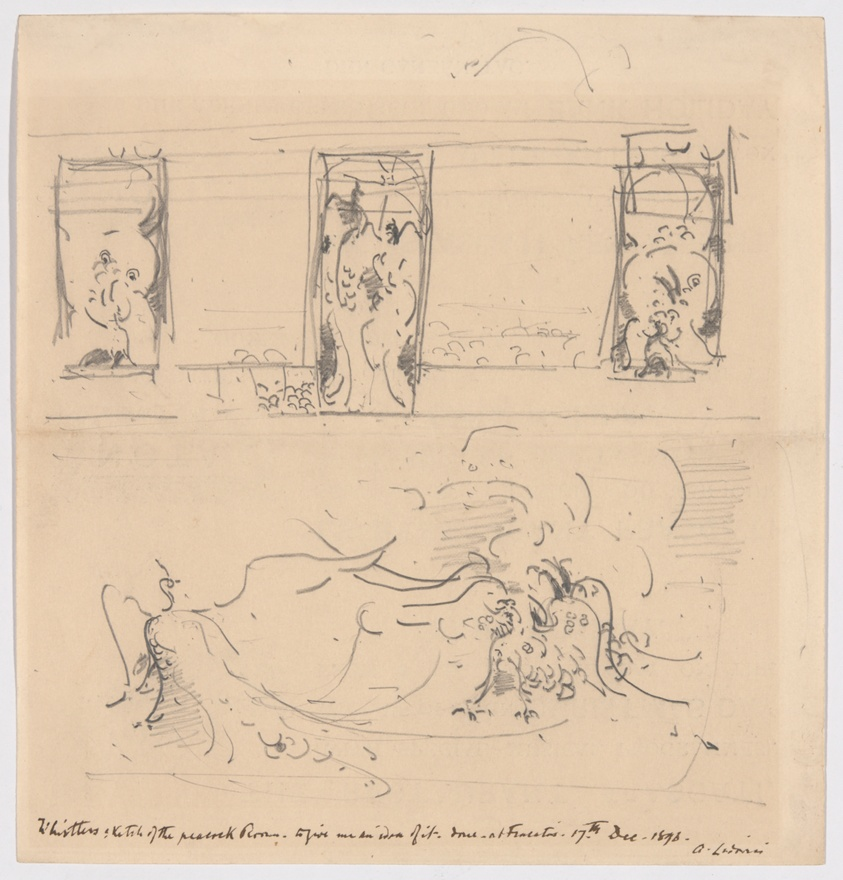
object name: Drawing and Watercolor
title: Sketch of the Peacock Room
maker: James McNeill Whistler (American, 1834-1903)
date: 1898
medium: Graphite (recto) on cream wove paper with printed text in black ink (verso)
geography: United States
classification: graphite; drawings (visual works); prints and drawing; paper